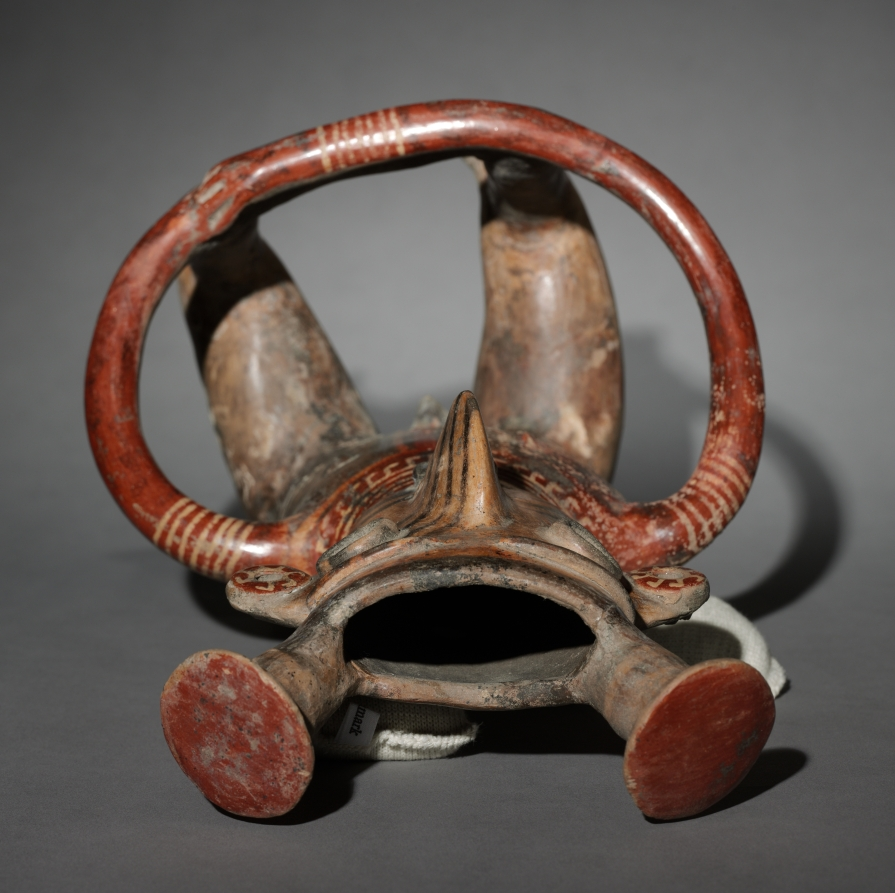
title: Seated Male Figure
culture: Mexico, Jalisco, Zacatecas Style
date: c. 200 CE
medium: earthenware with colored slips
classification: Sculpture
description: A female once accompanied this abstract male. The two may have had the same meaning as the nearby couple. They were also similarly linked by physical form, though the female’s head had no projections, the meaning of which is unknown. The size of the circle formed by the arms suggests that the figure once held something, perhaps a perishable offering.